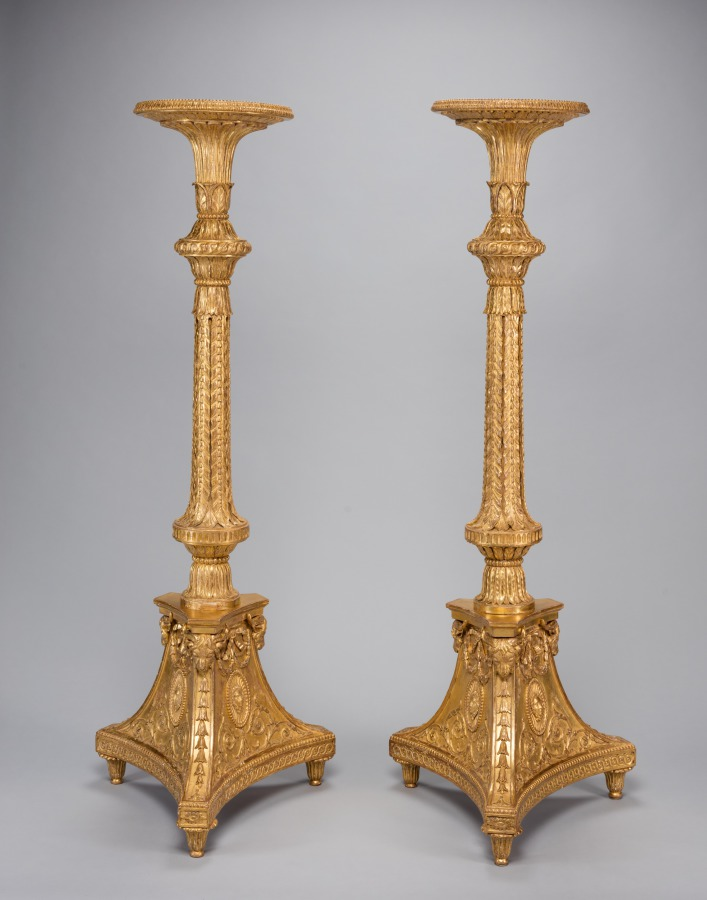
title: Pair of Candle Stands (torchères)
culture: England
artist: Thomas Chippendale (British, 1718–1779)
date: c. 1773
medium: Gilt-wood, gesso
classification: Furniture and woodwork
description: This pair of gilded candle stands was made by Thomas Chippendale, the most renowned cabinetmaker in eighteenth-century London, for the grand drawing room of Brocket Hall, a large country house in Hertfordshire, England. With finely carved acanthus leaves, swags, fluting, and oval masks depicting the Roman goddess Diana, these candle stands exhibit Chippendale’s masterful understanding of neoclassical proportion, scale, and ornament. His landmark book of furniture designs, The Gentleman and Cabinet-Maker’s Director (first published in 1754), was highly admired as a source of inspiration by cabinetmakers and architects around England as well as in Europe and America.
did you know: Candle stands usually held silver or crystal candelabra that were lit for evening entertainment.